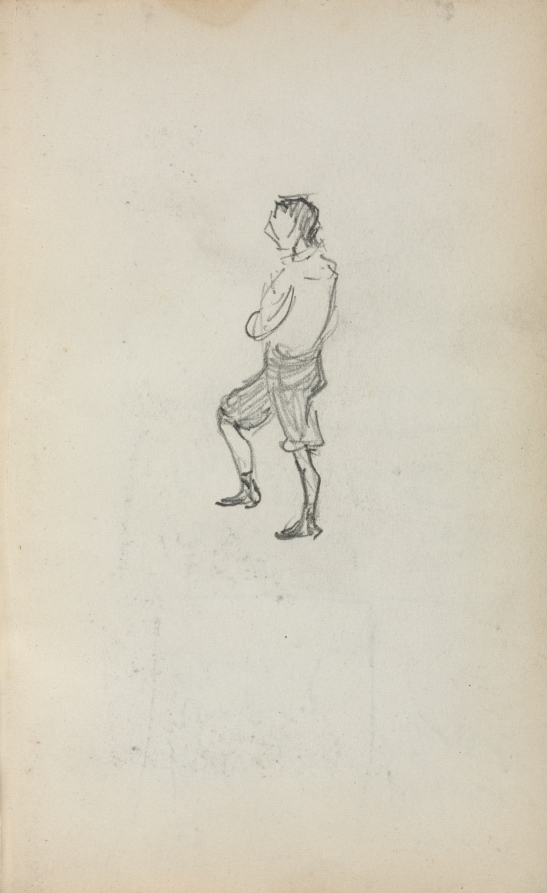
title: Italian Sketchbook: Standing Boy (page 245)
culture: America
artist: Maurice Prendergast (American, born Newfoundland [now Canada], 1858–1924)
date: 1898–1899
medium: pencil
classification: Bound Volume